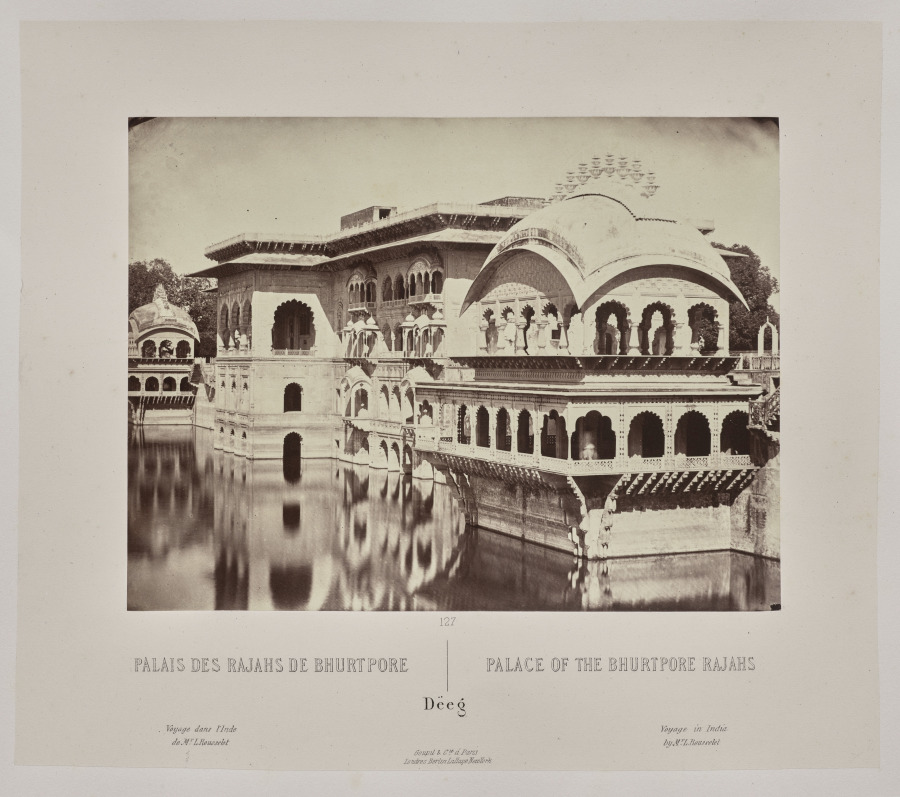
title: Palace of the Bhurtpore Rajahs, Dëeg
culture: France, 19th century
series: India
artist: Louis-Théophile Marie Rousselet (French, 1845–1929)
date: 1865–68, published 1869–70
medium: Albumen print from glass plate negative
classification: Photograph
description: Concerned that his drawings did not do justice to the splendor of India’s monuments, Rousselet learned photography in India that year, a remarkable accomplishment. He proved to be a talented photographer with a sophisticated sense of composition. The scenes in this volume sweep across sites of Sultanate, Rajput, and Mughal power in northern India, from the sacred Hindu city of Varanasi on the Ganges River to Alwar in Rajasthan. Also included are several scenes of industry and portraits of Indian rulers.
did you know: Louis Rousselet described himself as a “scientific traveler” when he went to India alone at age 18 in 1863 and stayed into 1868.